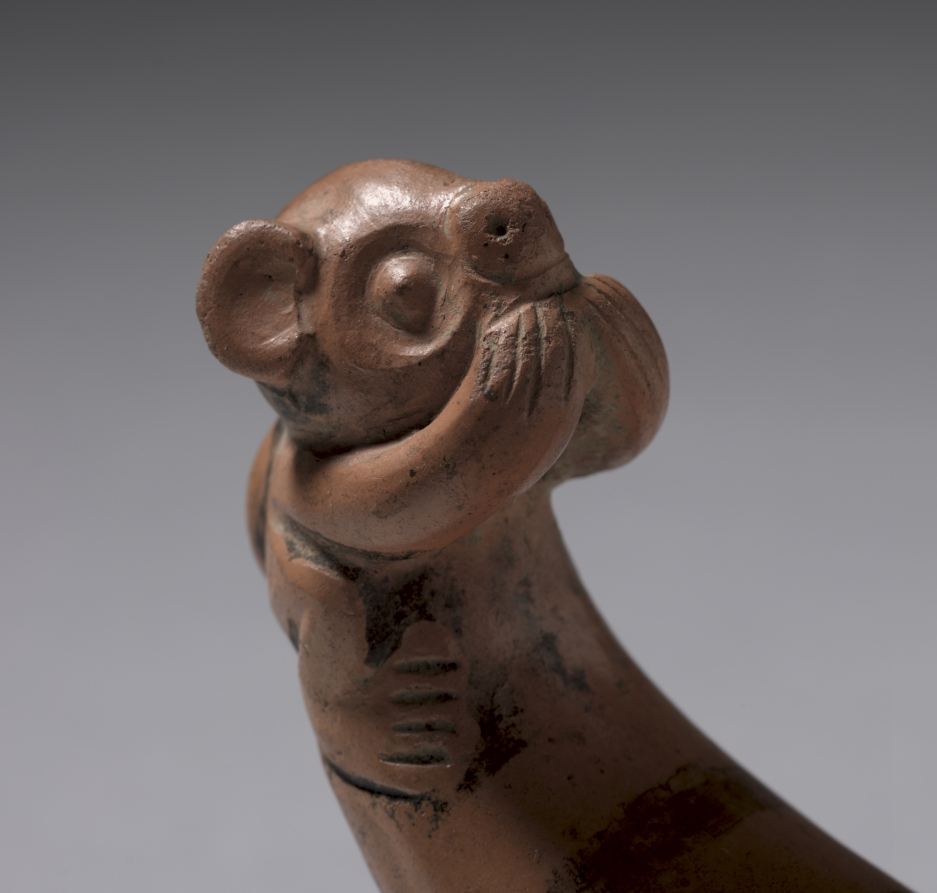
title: Dipper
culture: Peru, North Highlands, Recuay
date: 100 BCE–700 CE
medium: ceramic, slip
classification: Ceramic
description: Both of these objects feature a creature known as the "Recuay feline," although it could also refer to a fox, dog, or viscacha (a rodent). Whatever its identity, the prominent crest on its head ties it to the supernatural realm, a connection underlined by the deity head that also appears on the dipper and by the ritual function of snuff tablets, which were used to inhale hallucinogenic snuffs during religious ceremonies.